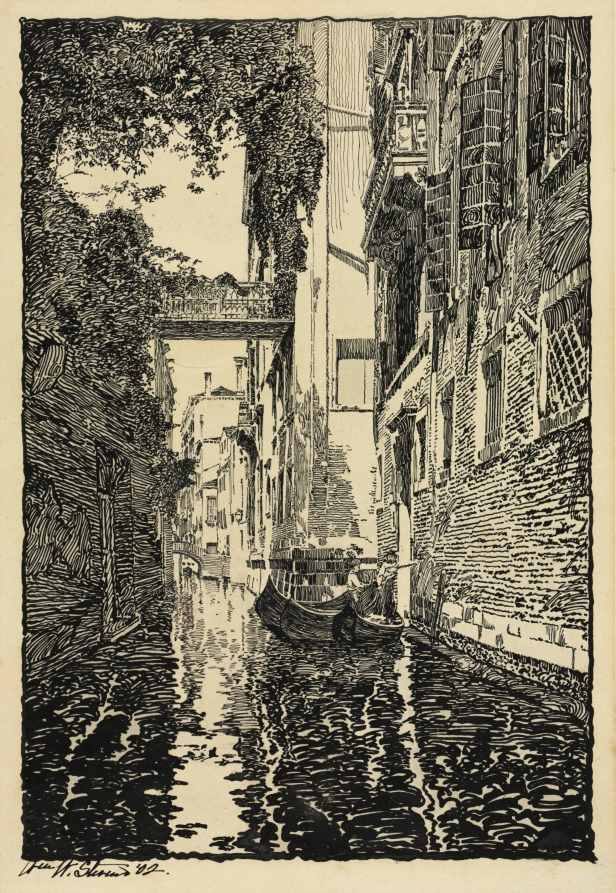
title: Venetian Canal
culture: America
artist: William Wentworth Stevens (American)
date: 1902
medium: India ink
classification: Drawing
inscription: Signed in ink